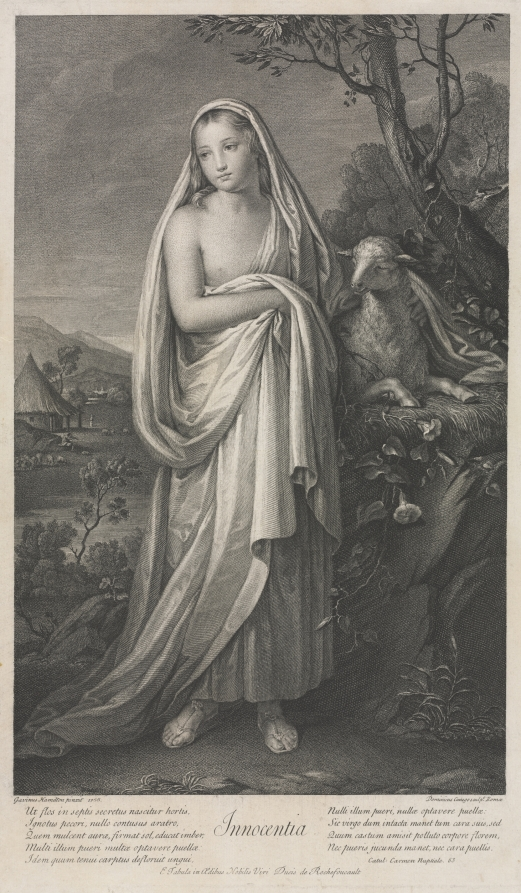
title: Innocence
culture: Italy, 18th century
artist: Domenico Cunego (Italian, 1726–1803)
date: 1766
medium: engraving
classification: Print